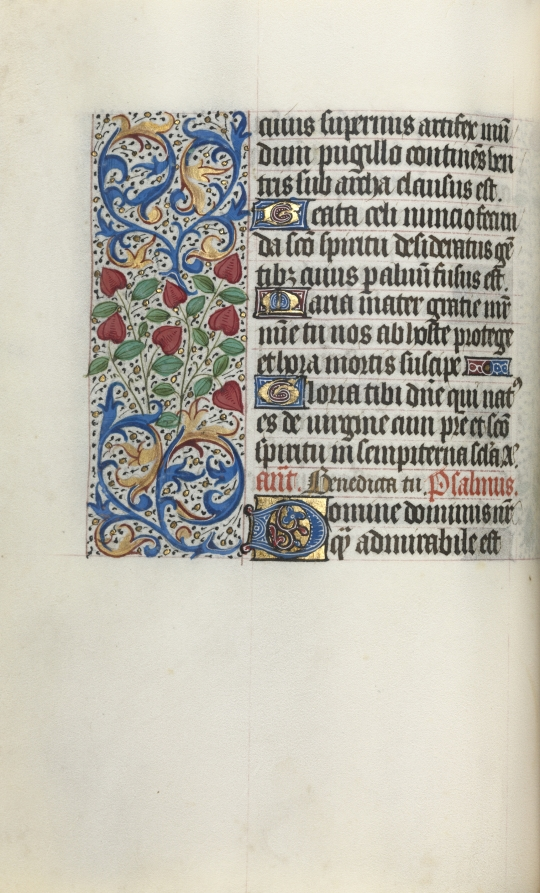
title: Book of Hours (Use of Rouen): fol. 30v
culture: France, Rouen, 15th century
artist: Master of the Geneva Latini (French, active Rouen, 1460–80)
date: c. 1470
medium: ink, tempera, and gold on vellum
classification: Bound Volume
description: In the late 1400s and early 1500s Rouen was an established and important center of book production. The city’s cathedral had a wealthy chapter that spent large sums of money to commission books and to maintain its extensive library. The stationers and booksellers would have likely been concentrated in or near the cathedral precinct. This artist, named after a manuscript now in Geneva, was Rouen’s principal illuminator during the second half of the 1400s.